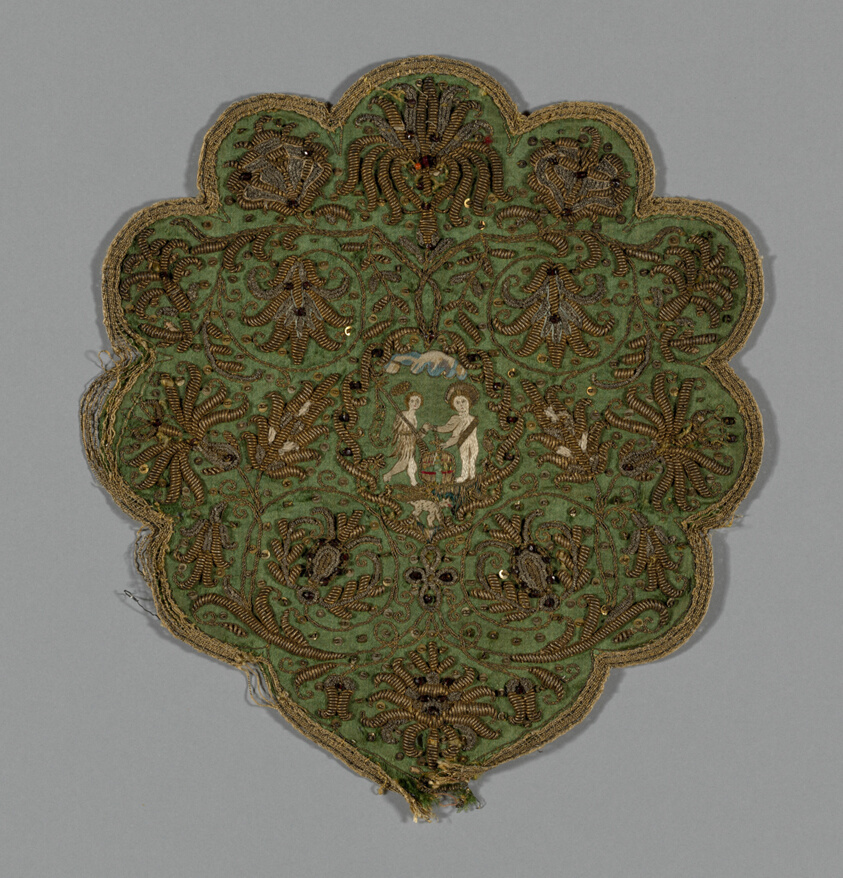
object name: Textile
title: Medallion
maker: Italy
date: 17th century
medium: Silk; embroidered with silk and metal thread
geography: Italy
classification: textile; needlework (visual works)